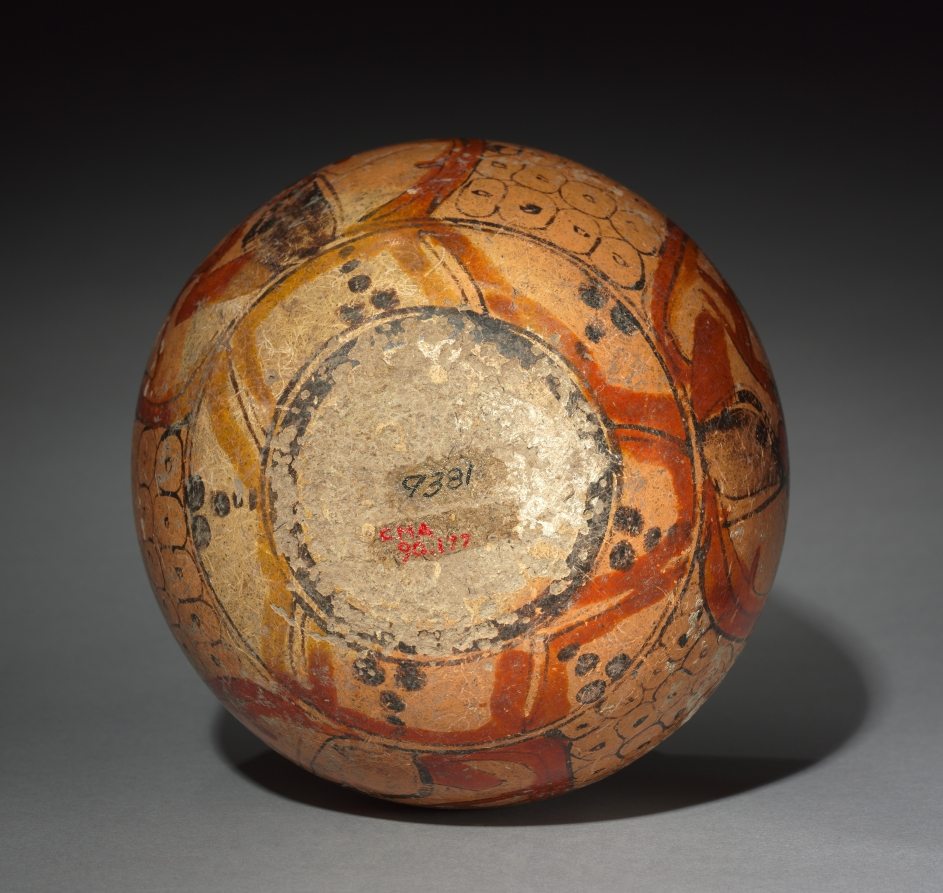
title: Bowl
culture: Mexico or Guatemala, Maya, Late Classic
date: 600–900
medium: pottery with burnished, colored slips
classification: Ceramic